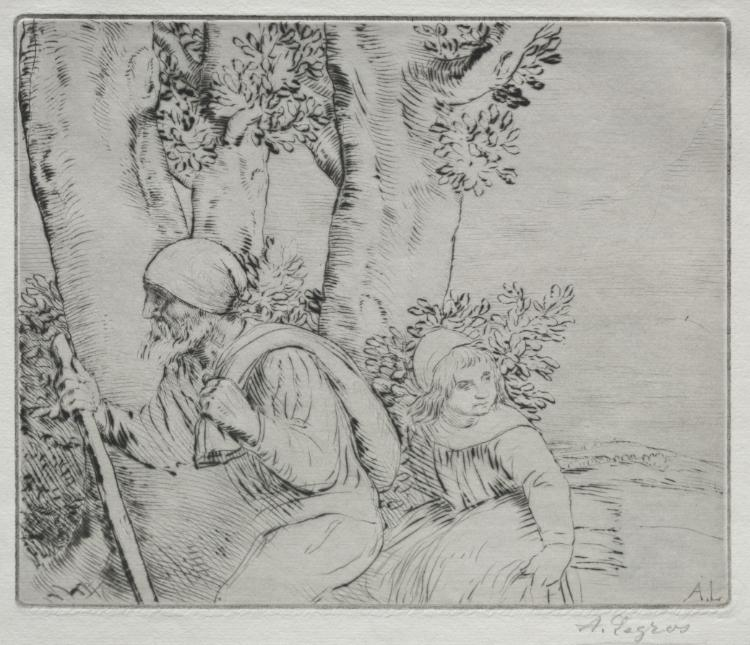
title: Return from the Field (2nd plate)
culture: France, 19th-20th century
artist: Alphonse Legros (French, 1837–1911)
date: c. 1857–1911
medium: etching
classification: Print